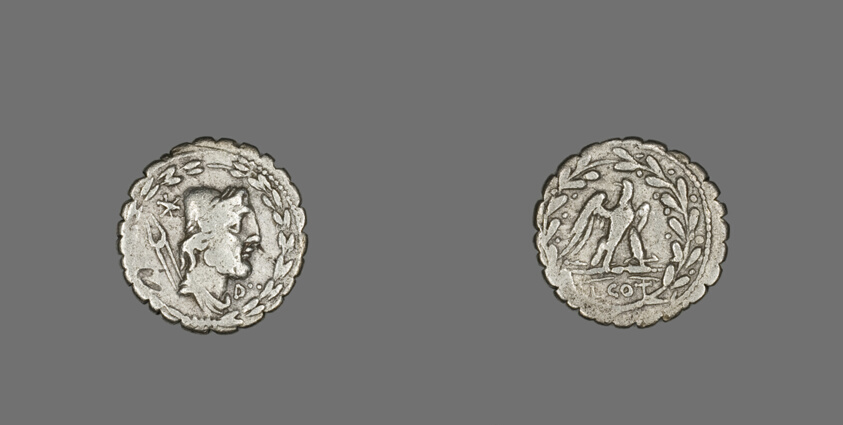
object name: Coin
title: Denarius Serratus (Coin) Depicting the God Vulcan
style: republic period, ancient, roman (ancient, style or period)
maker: Roman, minted in Rome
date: 105 BCE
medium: Silver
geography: Italy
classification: coin; ancient art; struck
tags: gods (deities), eagles